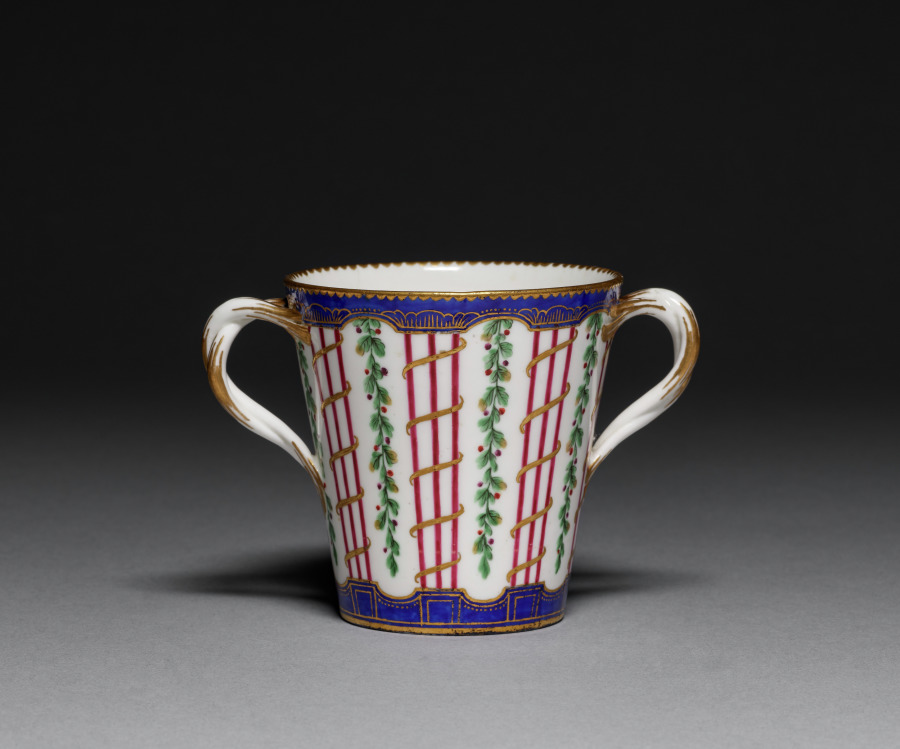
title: Cup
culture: France, Sèvres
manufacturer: Sèvres Porcelain Factory (French, est. 1756)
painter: Louis-Jean Thévenet pere (French, 1708-)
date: 1764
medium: soft-paste porcelain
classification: Ceramic